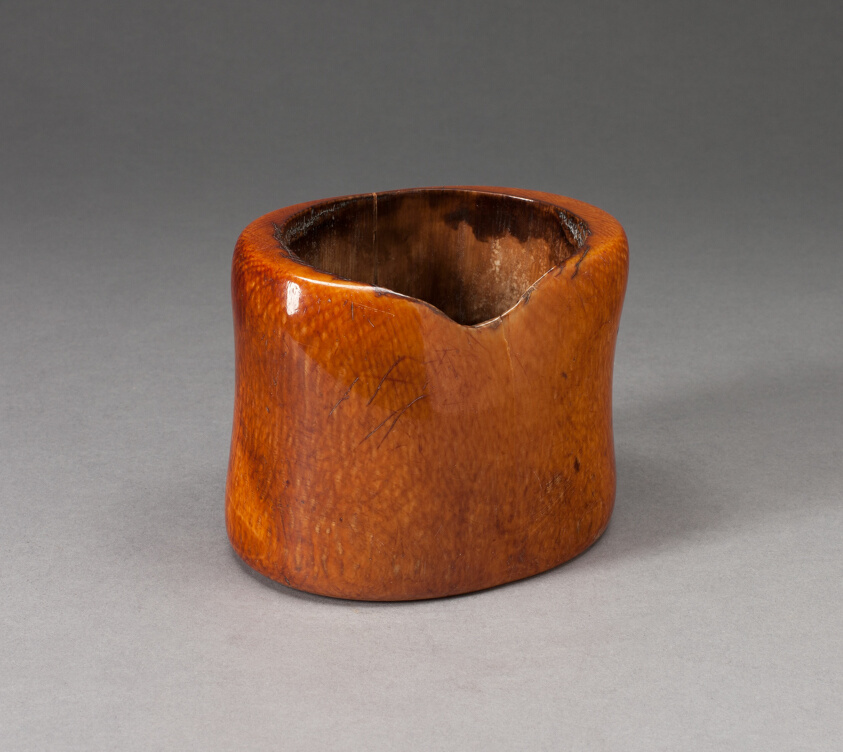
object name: Costume and Accessories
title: Four Bracelets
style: igbo, Arts of Africa, african Art, Coastal West Africa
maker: Igbo; Nigeria; Coastal West Africa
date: Probably 19th century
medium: Ivory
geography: Nigeria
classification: bracelet (jewelry); ivory; jewelry; arts of Africa; african art; costume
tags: costume